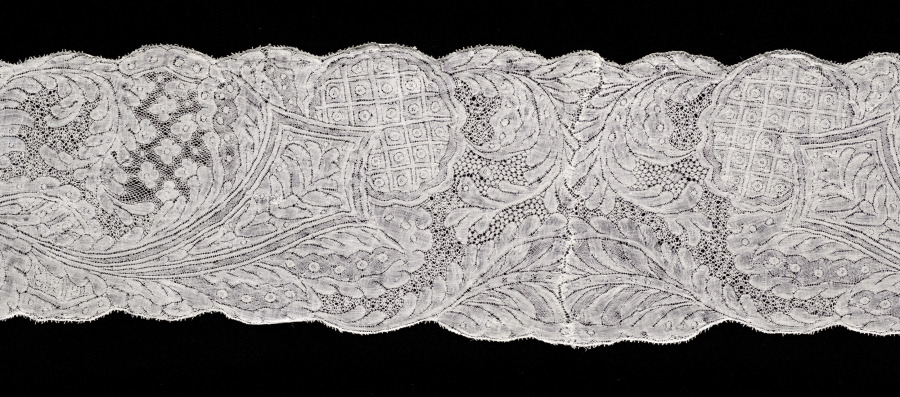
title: Pair of Lace Lappets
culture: France, Valenciennes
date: 1700–1720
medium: Linen: bobbin lace (Valenciennes)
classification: Lace